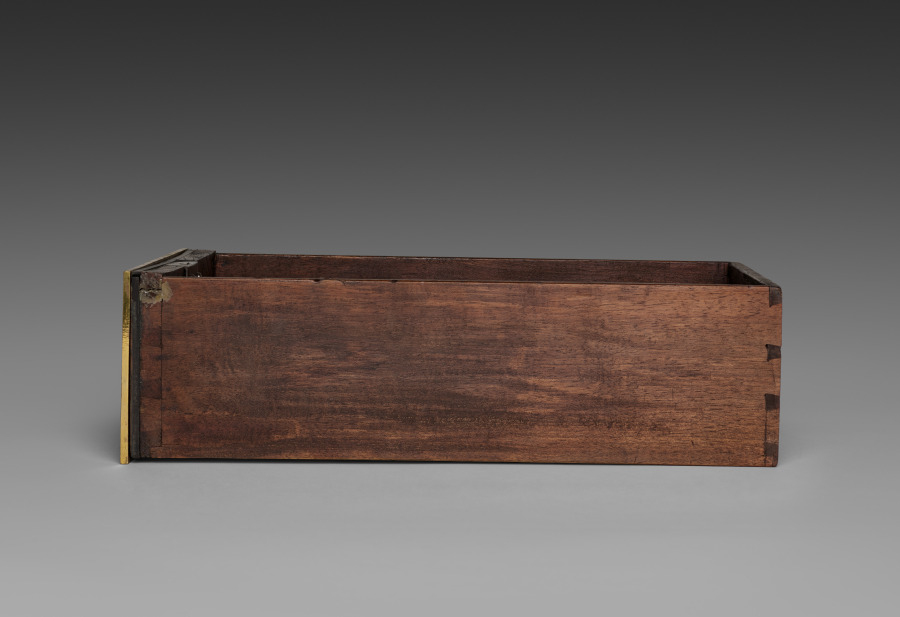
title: Side Drawer for Cabinet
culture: France, late 17th Century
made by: André-Charles Boulle (French, 1642–1732)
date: c. 1690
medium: ebony, marquetry in metal and tortoise shell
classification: Furniture and woodwork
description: Appointed cabinetmaker to King Louis XIV in 1672, André-Charles Boulle became a master of furniture making in France during the late 1600s until his death in 1732. Known primarily for his use of marquetry, in which metal patterns are inlaid into tortoiseshell then applied within the veneered surface of the furniture, Boulle established a level of quality and craftsmanship few others could achieve. As a result, his work found favor at the royal court and among other aristocrats and diplomats eager to impress the king. The inclusion of a medallion depicting Louis XIV within the bronze decoration of this chest would have identified the owner with the royal court. Often exhibiting stout architectural proportions with elegant groups of inlaid motifs such as the parrot on the central panel of this chest, Boulle’s designs are an example of the intellectual fashion for contrasting ideas, materials, and motifs.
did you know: Originally designed to sit atop an elaborate tall stand, this chest was likely altered in the late 1700s to reduce its scale and height.